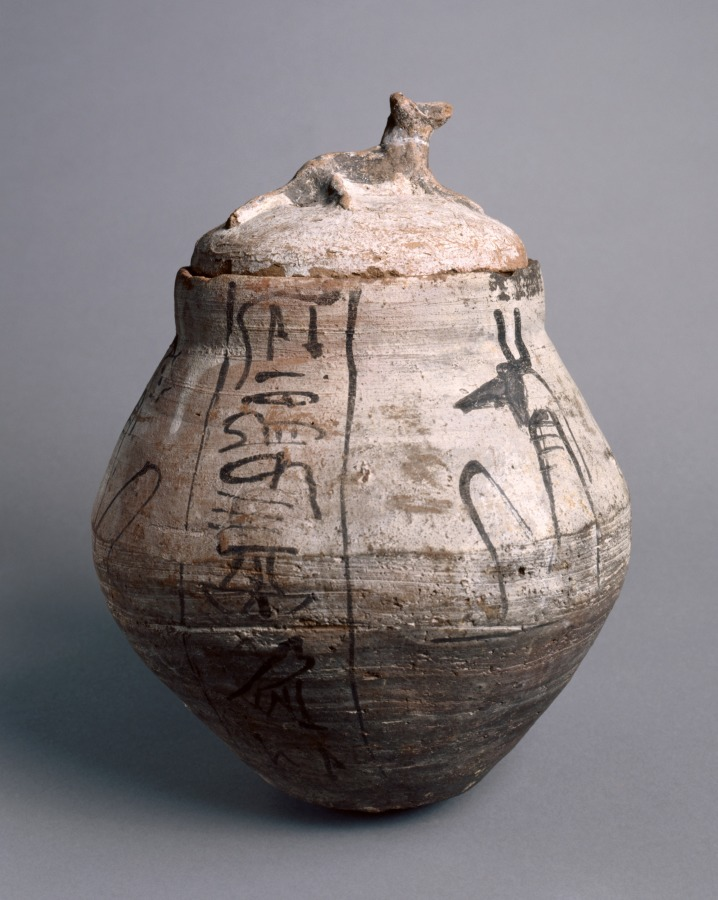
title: Shawabty Jar with Lid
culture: Egypt, New Kingdom (1540–1069 BCE), Dynasties 19–20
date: 1295–1069 BCE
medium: Nile silt ware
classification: Funerary Equipment